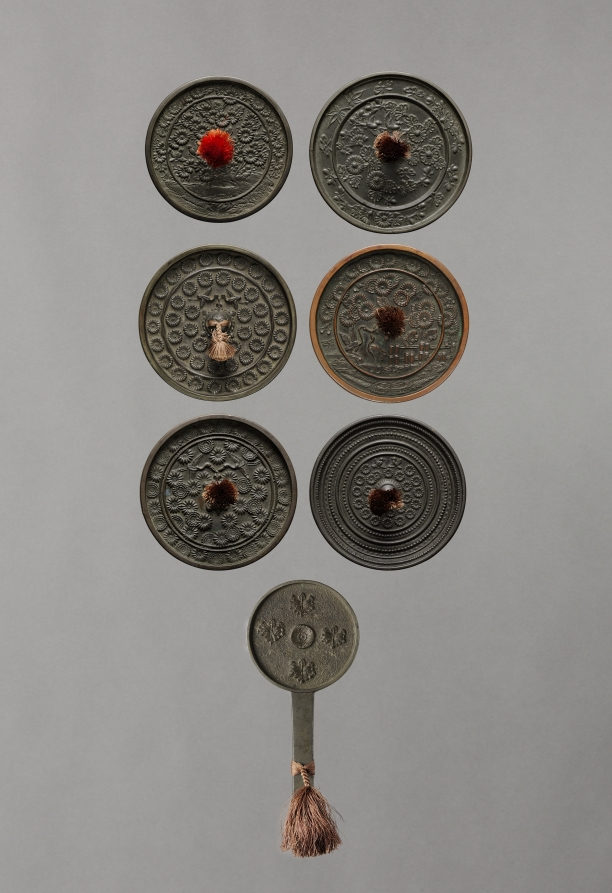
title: Mirror with Pair of Cranes in Chrysanthemum Pattern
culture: Japan, Muromachi period (1392–1573)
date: 1392–1573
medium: bronze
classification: Metalwork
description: The Japanese used chrysanthemums as decorative elements on mirrors. In the Heian period, a chrysanthemum with cranes or long-tailed birds was a common motif. Later, in the Kamakura and Muromachi periods, chrysanthemum designs were divided into three patterns with different symbolic associations: Chrysanthemum with Cranes represented longevity; Water Flowing suggested longevity as well as the Noh drama Kikujido, or Chrysanthemum Boy; and East Fence alluded to the poem "Drinking Wine" by Tao Yuanming (AD 365-427). Here, the mirror featuring Buddhist iconography (kyojo) and a chrysanthemum design on the back shows that the flower was also appreciated in the context of Buddhism in the Kamakura period.